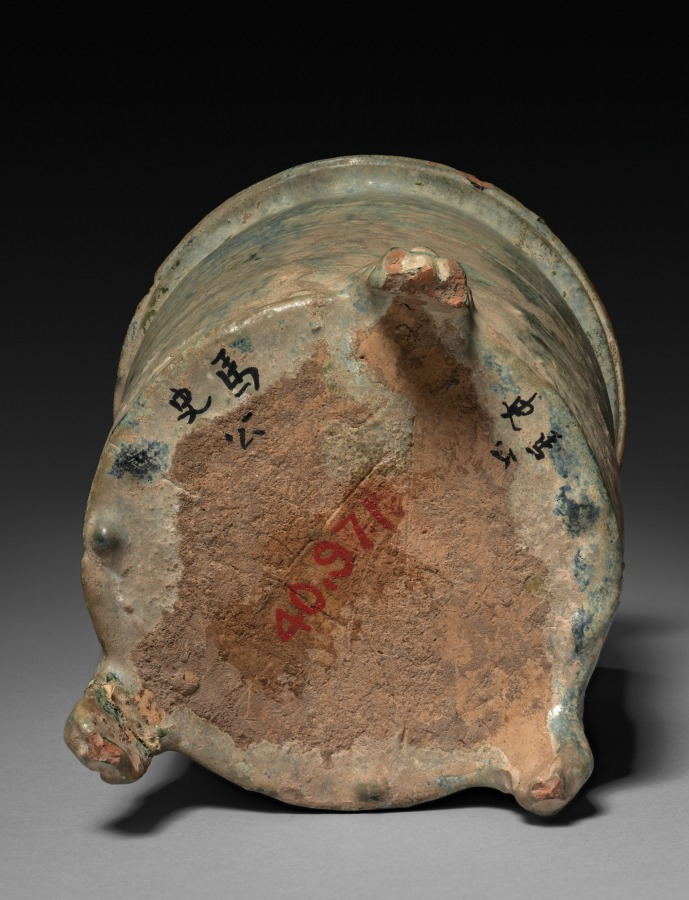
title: Granary Urn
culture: China, Han dynasty (202 BCE–220 CE)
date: 206 BCE–220 CE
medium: glazed earthenware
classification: Ceramic